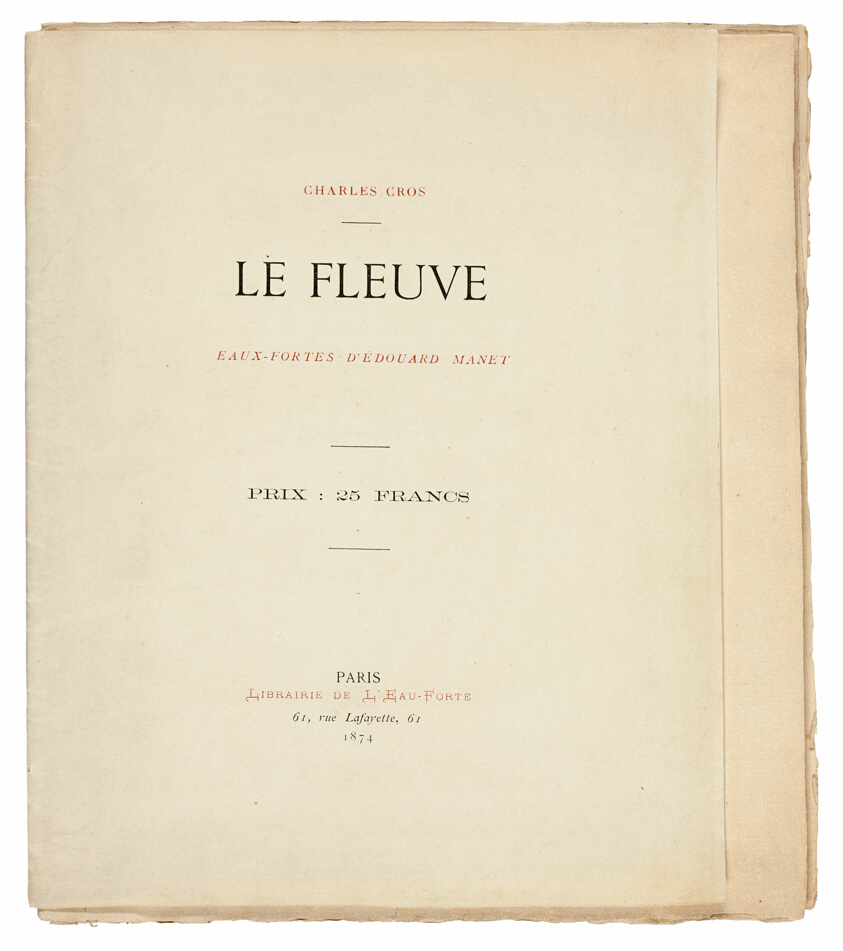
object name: Book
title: Le Fleuve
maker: Édouard Manet (French, 1832-1883); written by Charles Cros (French, 1842-1888); printed by Auguste Delâtre (French, 1822-1907) and Cochet (French, 19th century); published by Librairie de l'eau-forte (French, 19th century) and Richard Lesclide (French, 1825-1892)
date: 1874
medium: Unbound poem of five folded sheets; cover on ivory wove paper, poem and etchings, drypoints and aquatint on ivory laid paper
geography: France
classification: etching; book; prints and drawing